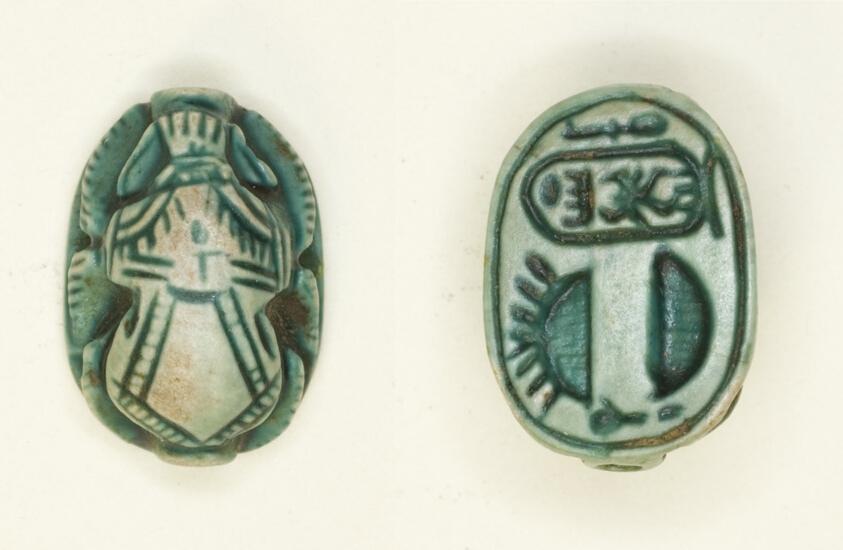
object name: Costume and Accessories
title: Scarab: Menkheperura (Thutmose IV)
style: new kingdom, eighteenth dynasty, egyptian, ancient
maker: Egyptian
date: New Kingdom, Dynasty 18, Reign of Thutmose IV (about 1400–1390 BCE)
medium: Glazed steatite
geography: Egypt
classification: scarab; ancient art; costume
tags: Hieroglyphs, cartouches, insects, king, kings, pharaohs